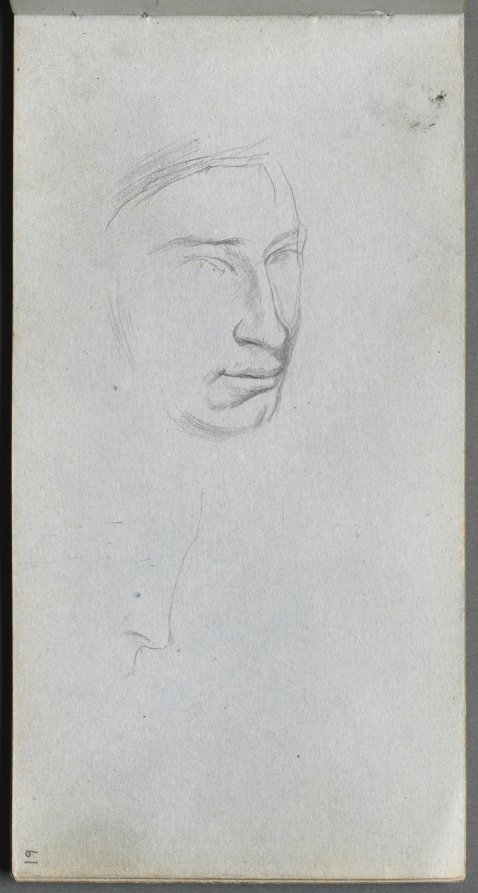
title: Sketchbook, page 61: Face, 3/4 view profile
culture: France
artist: Ernest Meissonier (French, 1815–1891)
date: c. 1860s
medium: graphite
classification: Bound Volume